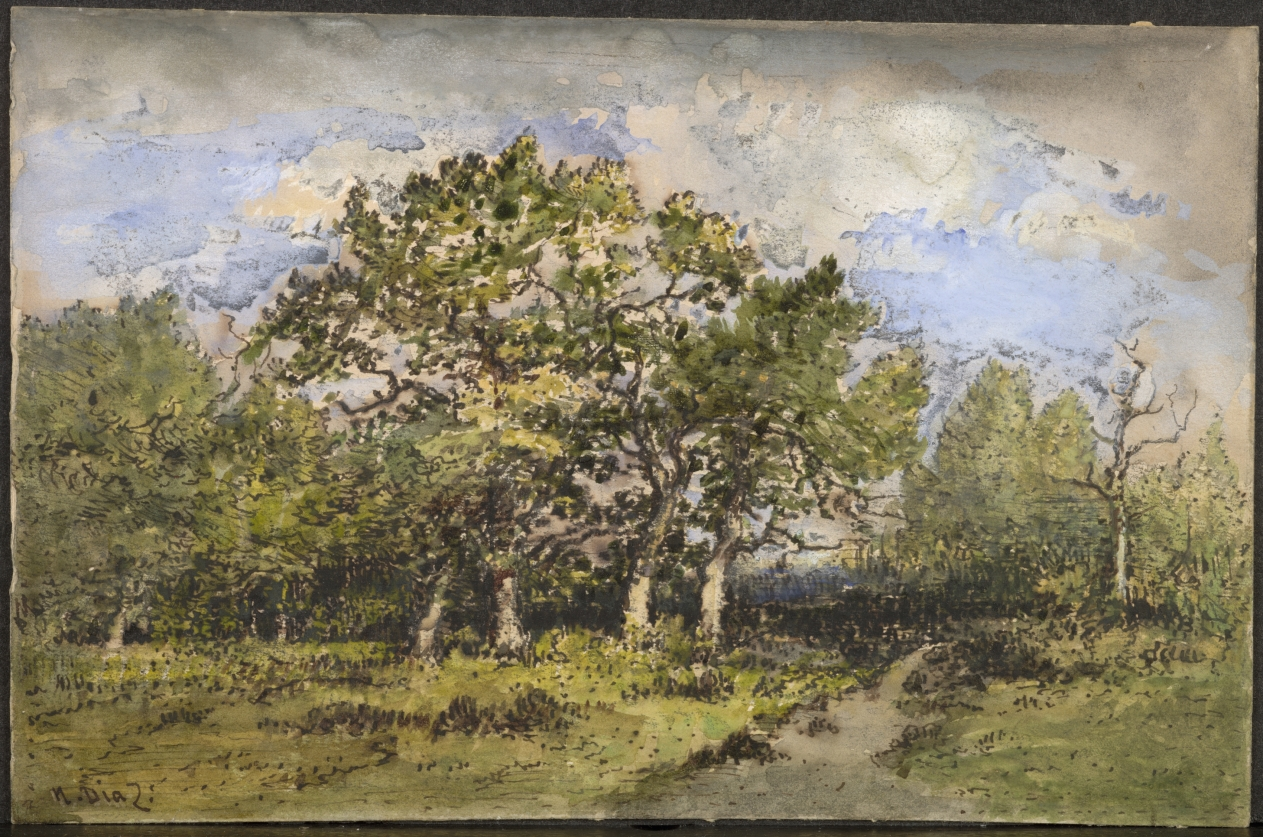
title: Landscape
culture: France, 19th century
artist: Narcisse Diaz de la Peña (French, 1807–1876)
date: c. 1860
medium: watercolor and gouache with pen and brown ink and graphite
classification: Drawing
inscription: signed, lower left, in brown ink: N. Diaz; verso, center, in graphite: 6435 [upside down]; lower right, in graphite: hw2x--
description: This is a rare watercolor by Narcisse Diaz, who worked primarily in oil. The view is likely from the forest of Fontainebleau, near the village of Barbizon. In the 1830s, Diaz and other painters like Jean-François Millet frequently painted there, out of doors, directly from nature.